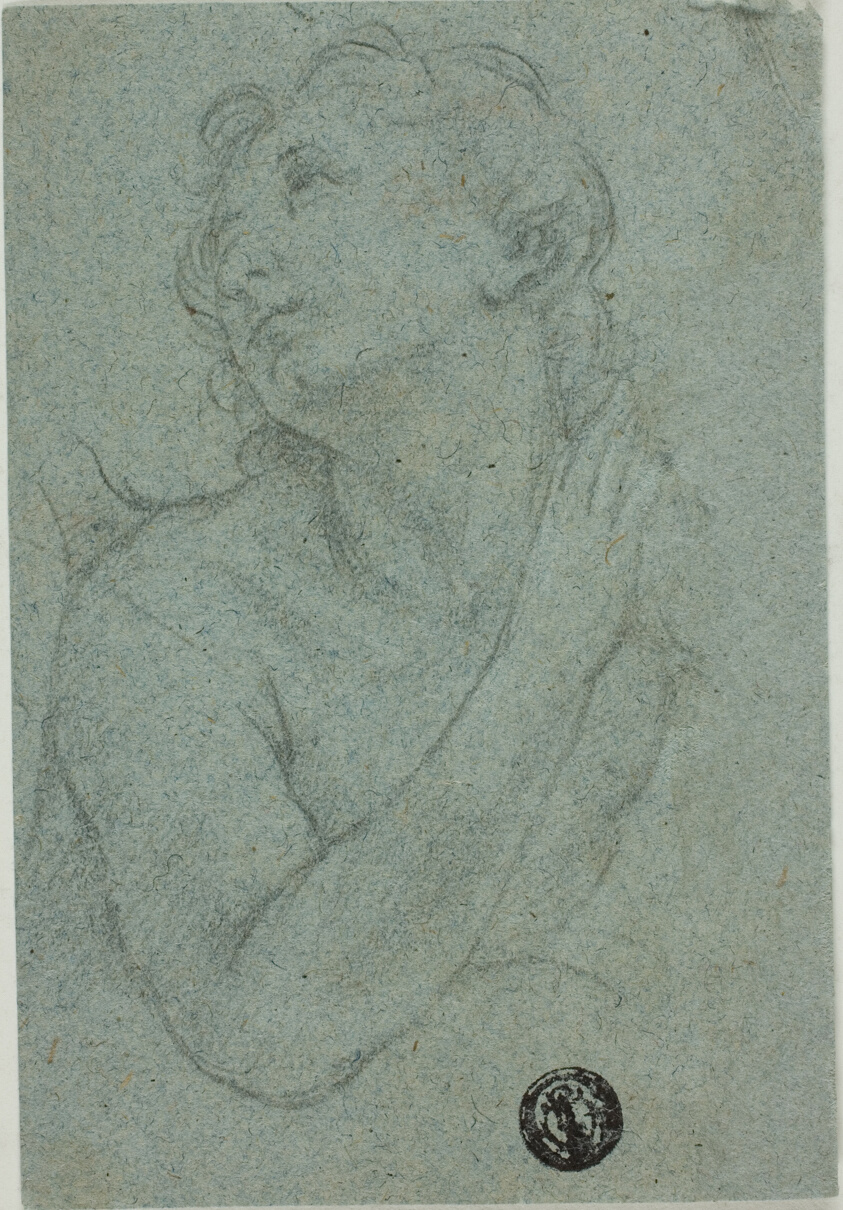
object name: Drawing and Watercolor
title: Half-Length Praying Figure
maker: Unknown Italian artist; style of Carlo Cignani (Italian, 1628-1719)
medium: Black and white chalk, on blue laid paper, tipped onto cream wove paper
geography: Italy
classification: drawings (visual works); prints and drawing